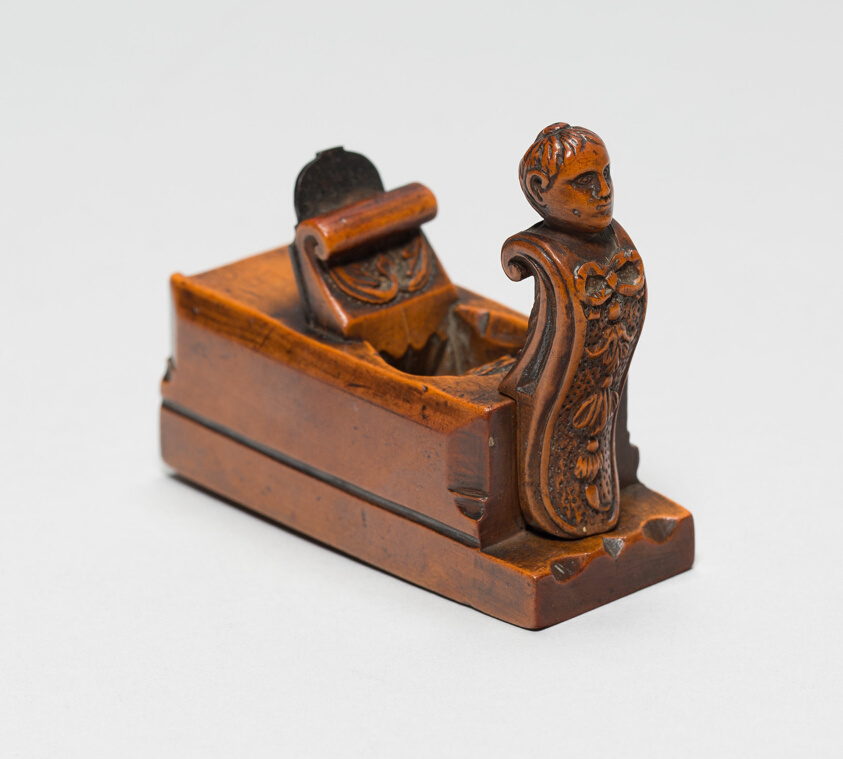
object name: Decorative Arts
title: Toothing Plane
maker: Possibly Germany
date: c. 1720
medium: Wood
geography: Germany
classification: tool; european decorative arts; decorative arts